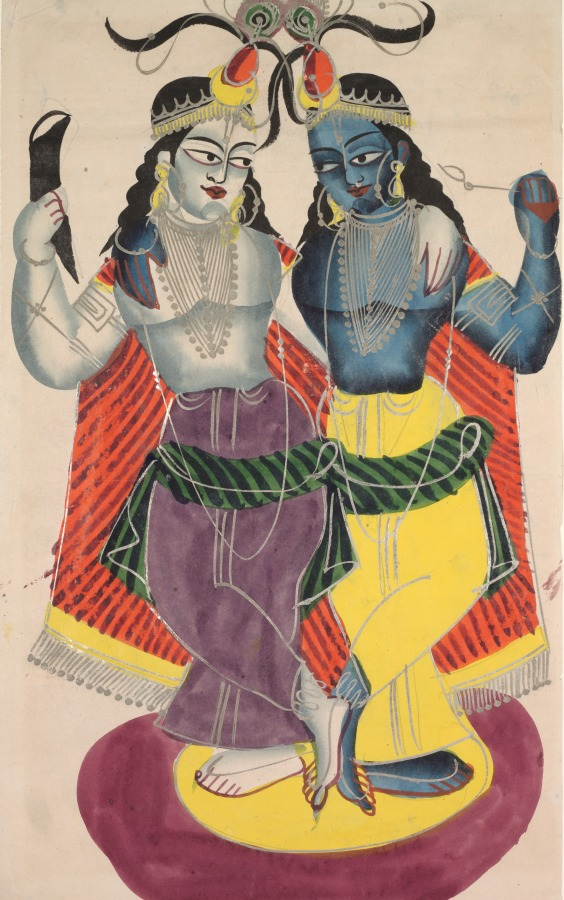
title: Balarama and Krishna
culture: Eastern India, Bengal, Kolkata, Kalighat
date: c. 1890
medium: Gum tempera, graphite, and ink on paper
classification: Painting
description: Here a divine sibling pair, Balarama and Krishna, are portrayed as mirror images of one another.